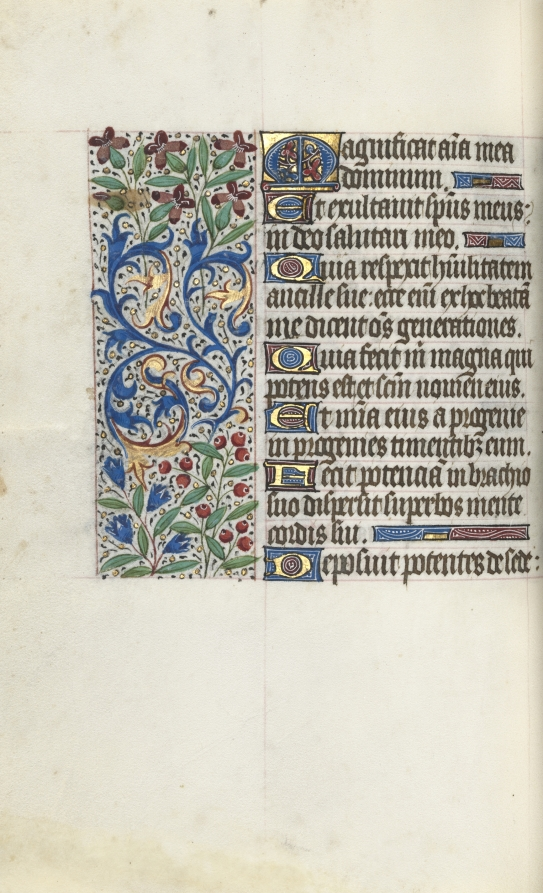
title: Book of Hours (Use of Rouen): fol. 107v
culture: France, Rouen, 15th century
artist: Master of the Geneva Latini (French, active Rouen, 1460–80)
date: c. 1470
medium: ink, tempera, and gold on vellum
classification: Bound Volume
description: In the late 1400s and early 1500s Rouen was an established and important center of book production. The city’s cathedral had a wealthy chapter that spent large sums of money to commission books and to maintain its extensive library. The stationers and booksellers would have likely been concentrated in or near the cathedral precinct. This artist, named after a manuscript now in Geneva, was Rouen’s principal illuminator during the second half of the 1400s.